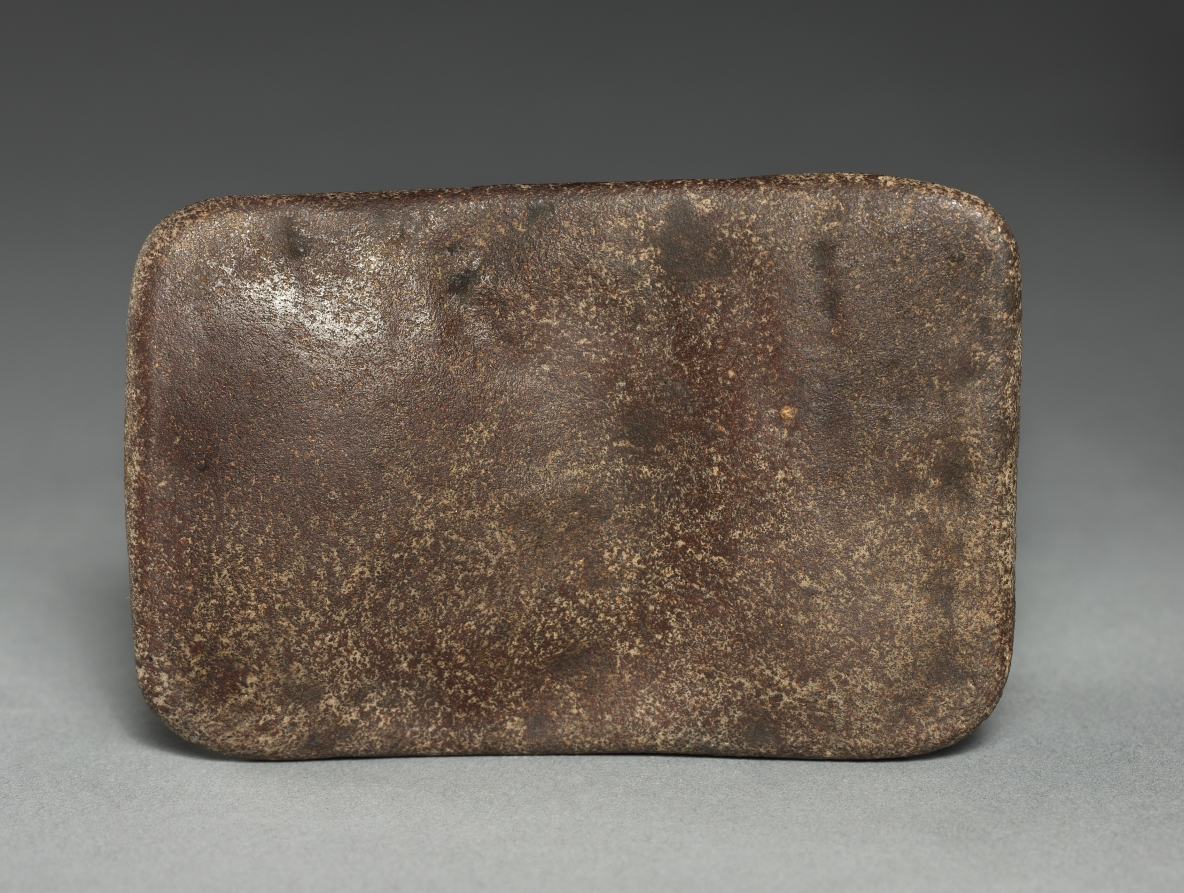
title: Toy Stone for Grinding Grain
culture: Mexico, Valley of Mexico (?), Aztec (?)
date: before 1929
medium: pottery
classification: Ceramic